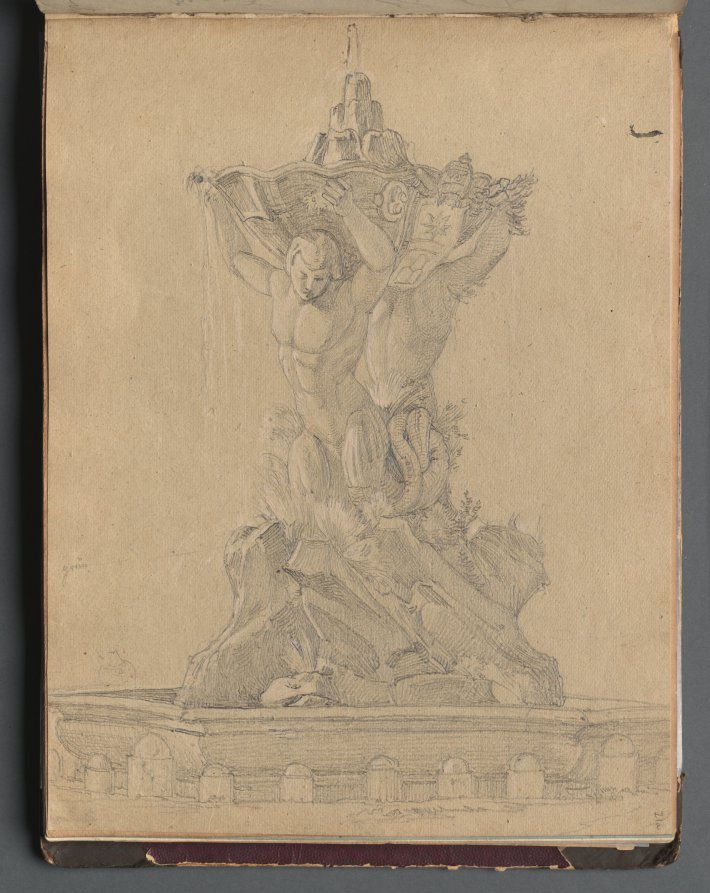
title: Album with Views of Rome and Surroundings, Landscape Studies, page 21a: Roman Fountian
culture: Germany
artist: Franz Johann Heinrich Nadorp (German, 1794–1876)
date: c. 1830s-70s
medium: graphite with white heightening on brown paper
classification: Bound Volume